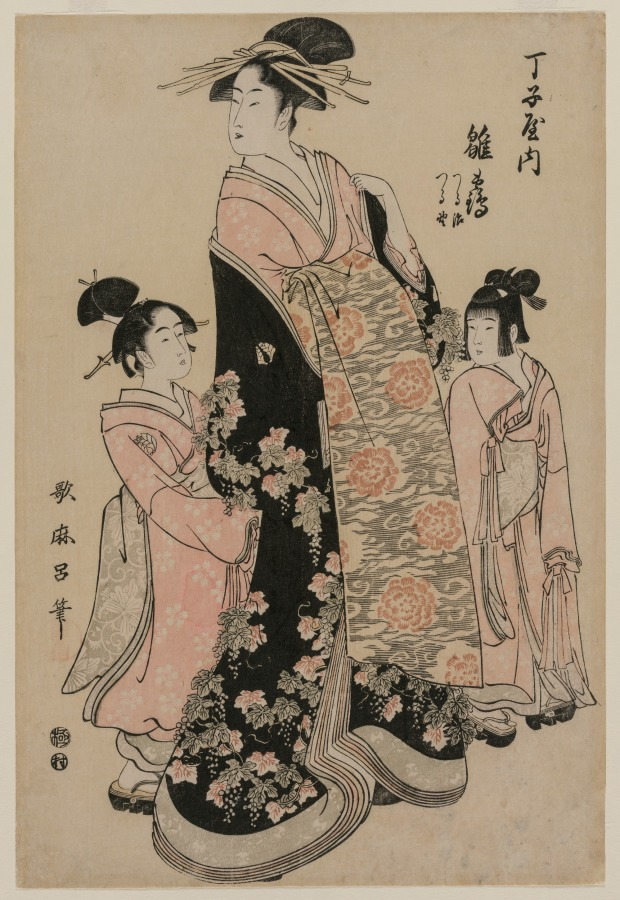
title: The Courtesan Hinazuru of Chojiya with her Attendants Tsuruji and Tsuruno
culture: Japan, Edo period (1615–1868)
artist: Kitagawa Utamaro (Japanese, c. 1754–1806)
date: c. 1794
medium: color woodblock print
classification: Print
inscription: Signature: Utamaro hitsu Artist Seal: Utamaro Publisher: Murataya Jirobei (Mura) Censorship Seal: kiwame